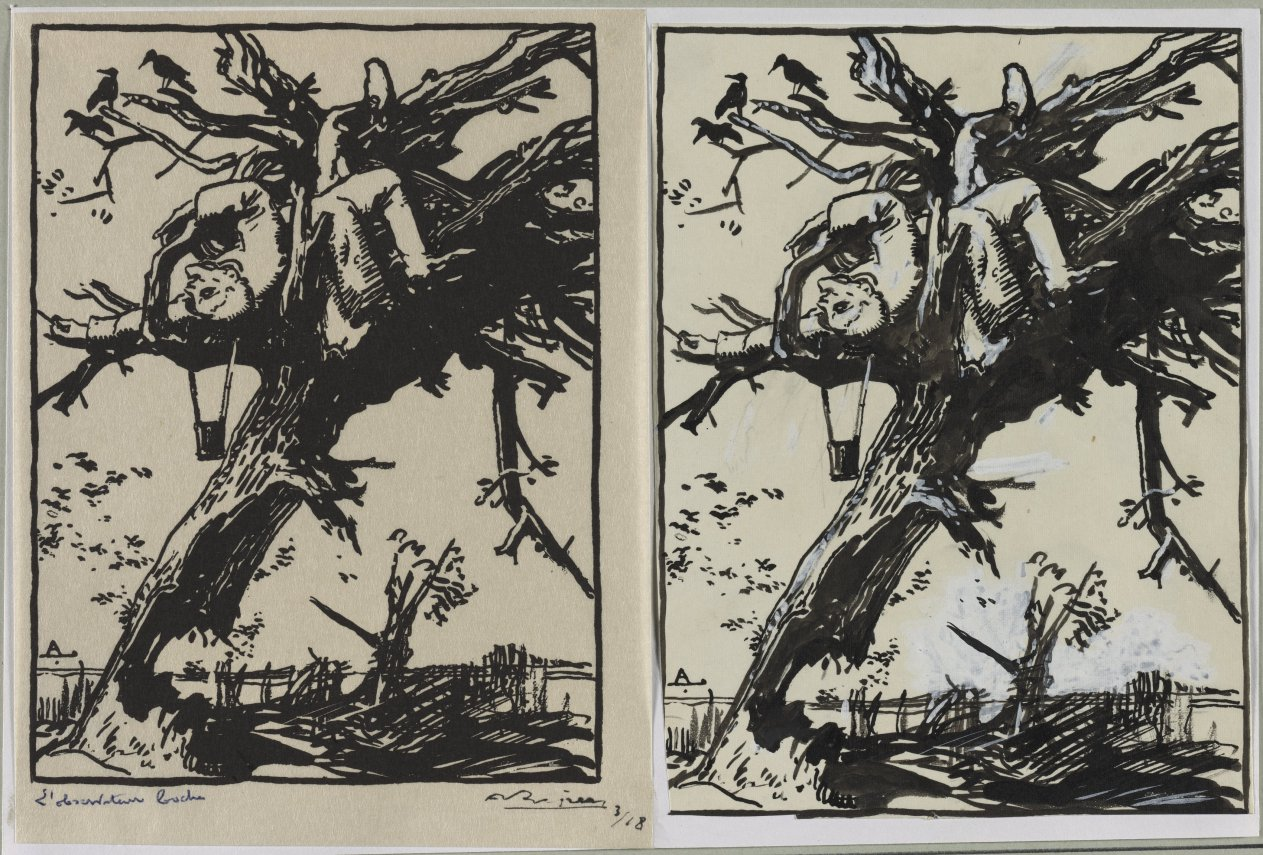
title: L'Oservateur boche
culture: France, 20th century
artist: Auguste Louis Lepère (French, 1849–1918)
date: 1914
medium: brush and black ink over pencil with white highlights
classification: Drawing